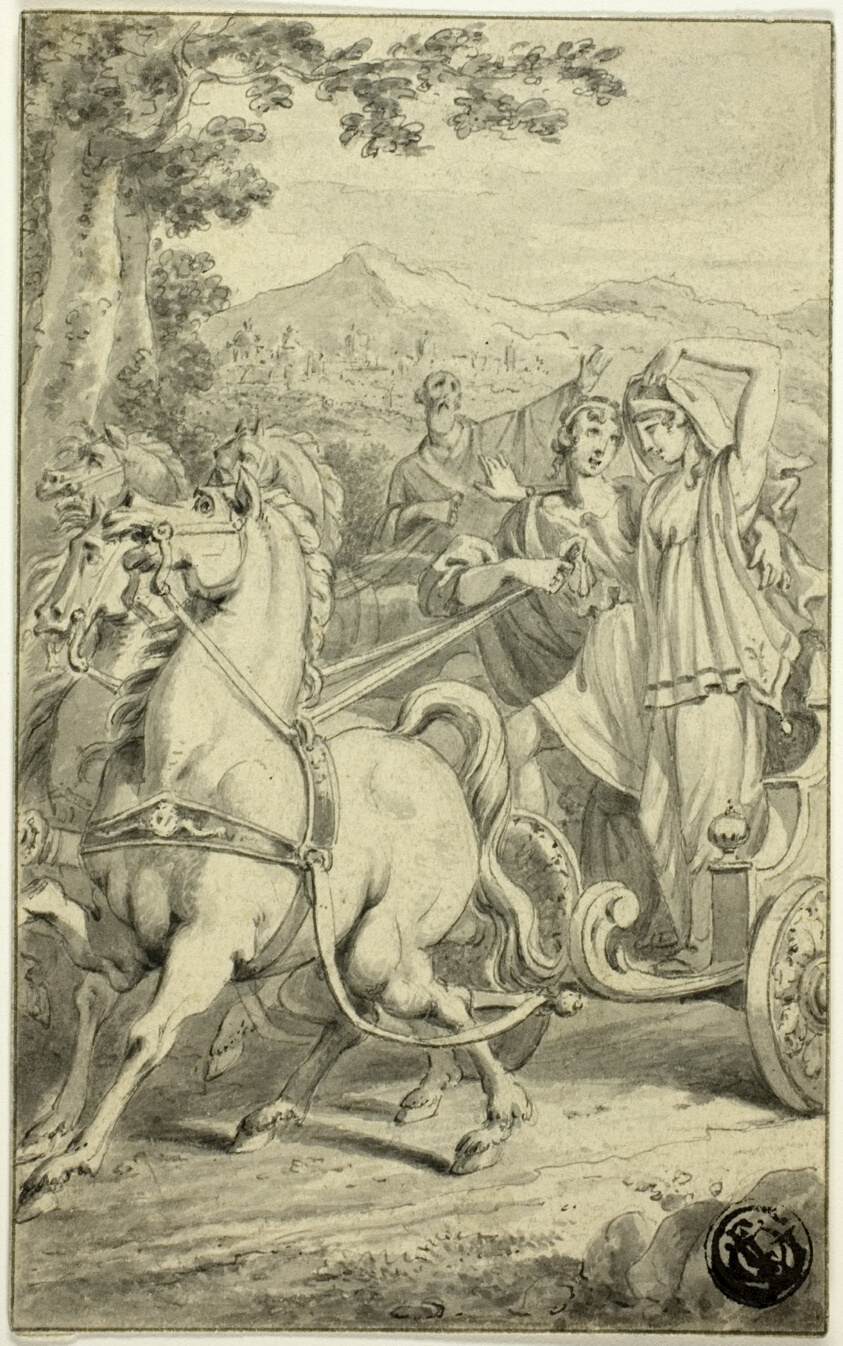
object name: Drawing and Watercolor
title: Classical Scene with Young Couple in Chariot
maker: Attributed to Jacob Smies; Dutch, 1764-1833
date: 1824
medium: Pen and gray ink, with brush and gray wash, over traces of graphite, on ivory wove paper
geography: Holland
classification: ink or chalk wash; drawings (visual works); prints and drawing